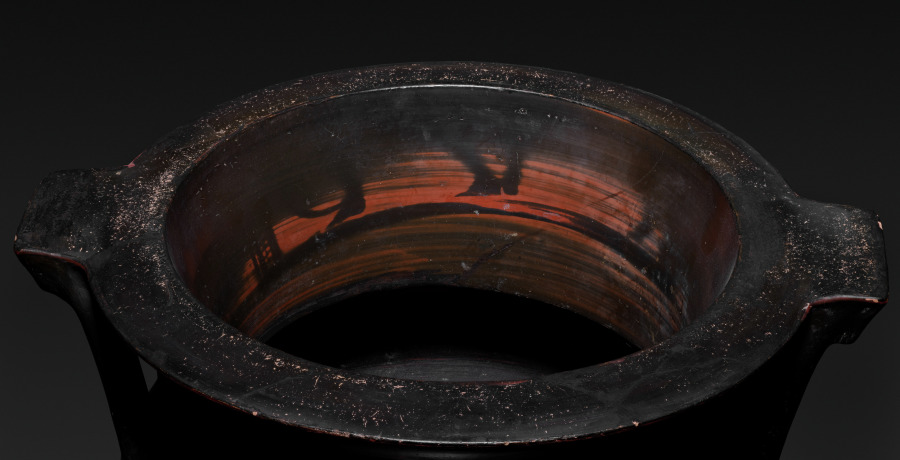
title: Red-Figure Column Krater (Mixing Vessel): Komos (Revel)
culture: Greek, Attic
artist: attributed to Pig Painter (Greek, Attic, active c. 480–460 BCE)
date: 470–460 BCE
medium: ceramic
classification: Ceramic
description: Used for mixing wine and water at a symposium (or drinking party), this column-krater speaks to the perils and pleasures of drinking. On one side, a bearded man holding a staff and a drinking cup leans forward, a red stream of vomit falling from his mouth. Before him is a nude young boy, holding a tortoiseshell lyre and a basket or pail. On the other side, a young man dances, holding a deep cup and wearing just one boot. On the neck above him, scratched in large letters, is the name SIMONOS, probably indicating that the vase once belonged to someone named Simon.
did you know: The bearded man on this vase is vomiting—perhaps a humorous warning against over imbibing.